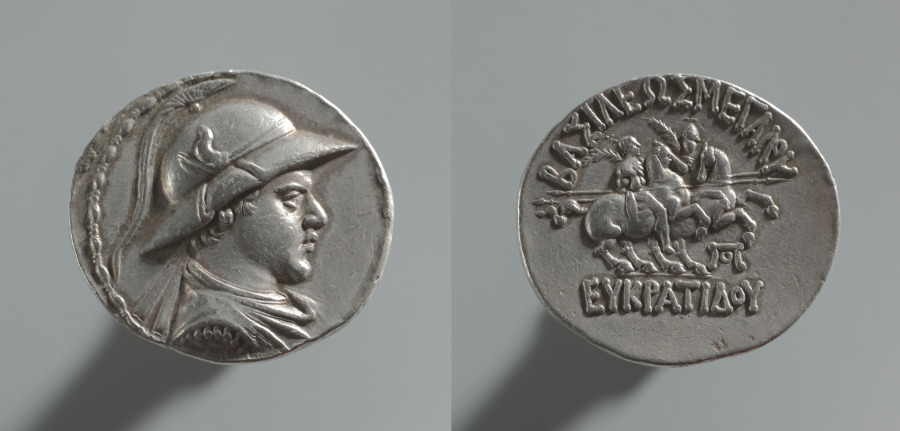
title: Coin of Eukratides I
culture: Afghanistan, Bactria, Eucratides I (171–145 BCE)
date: 170–145 BCE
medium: silver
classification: Coins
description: After Alexander of Macedon succeeded in conquering Egypt and Persia in 331 BC, his ambition to rule the known world led him further east across Bactria in Afghanistan, through the Hindu Kush mountain pass, and into India. There he succeeded in defeating all the local kings of the region until his men, on the brink of mutiny, insisted that they return to Greece. Alexander left governors in charge of his territories, and after his death in 323 BC, his governors became independent kings, establishing Hellenistic cities and a Greek cultural base in the region, which lasted for almost 200 years. The king of Greek descent who ruled over territories in Afghanistan and Pakistan depicted himself with the brimmed military helmet with the bull's ear and horn of Poseidon, worn by generals from Macedon, the northern Greek country from which Alexander came. After his death, Alexander's vast empire that stretched from Macedon across Egypt and Persia all the way to the Indus River was divided among military leaders in his army. On the reverse side of this coin are the twins Castor and Pollux riding horseback with long spears. These twins were sons of Zeus. Since Alexander considered himself to be an offspring of Zeus, Eukratides referenced his link to Alexander by including them on his coin.